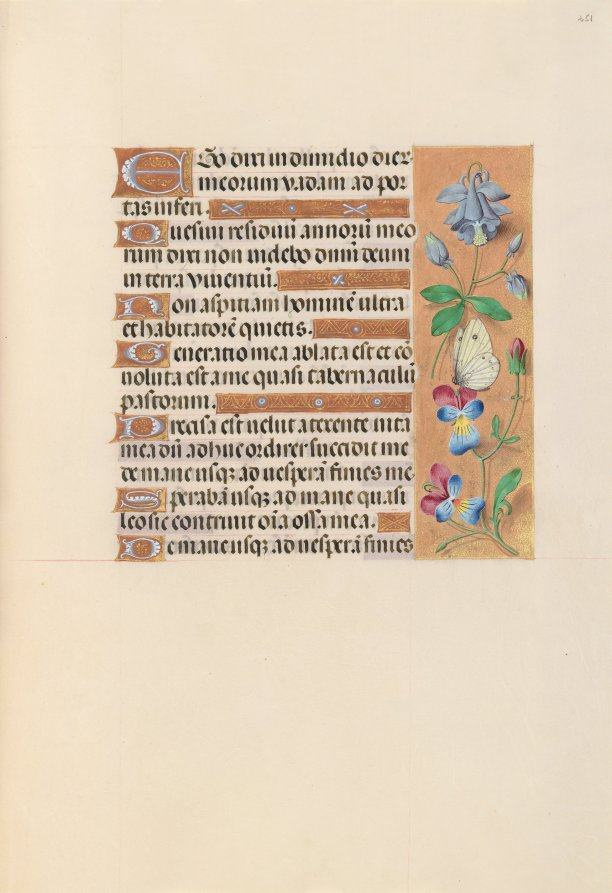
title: Hours of Queen Isabella the Catholic, Queen of Spain: Fol. 251r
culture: Flanders, Ghent and Bruges, late 15th century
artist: Master of the First Prayerbook of Maximillian (Flemish, c. 1444–1519)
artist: and Associates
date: c. 1500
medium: ink, tempera, and gold on vellum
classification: Bound Volume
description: This manuscript was illuminated by a circle of at least five highly organized manuscript painters active in the Flemish cities of Ghent and Bruges. The principal illuminator was Alexander Bening, who painted the majority of the book's miniatures. Manuscripts produced by this circle of artists are renowned for the decoration of their borders, which typically feature a rich variety of realistically-painted flowers, birds, and butterflies. This prayer book, called a book of hours, was intended not for a cleric, but for the private devotions of a lay person-in this case, Isabella the Catholic, Queen of Spain (1451-1504). Isabella's coat of arms embellishes the book's frontispiece. It is unlikely that the book was commissioned by the Queen herself; rather, she probably received it as a diplomatic gift from someone courting her patronage, perhaps Cardinal Francisco Jimenez de Cisneros. A Franciscan friar, Jimenez was dependent upon Isabella for his advancement, first to the post of Queen's confessor in 1492, and then to Archbishop of Toledo in 1495.